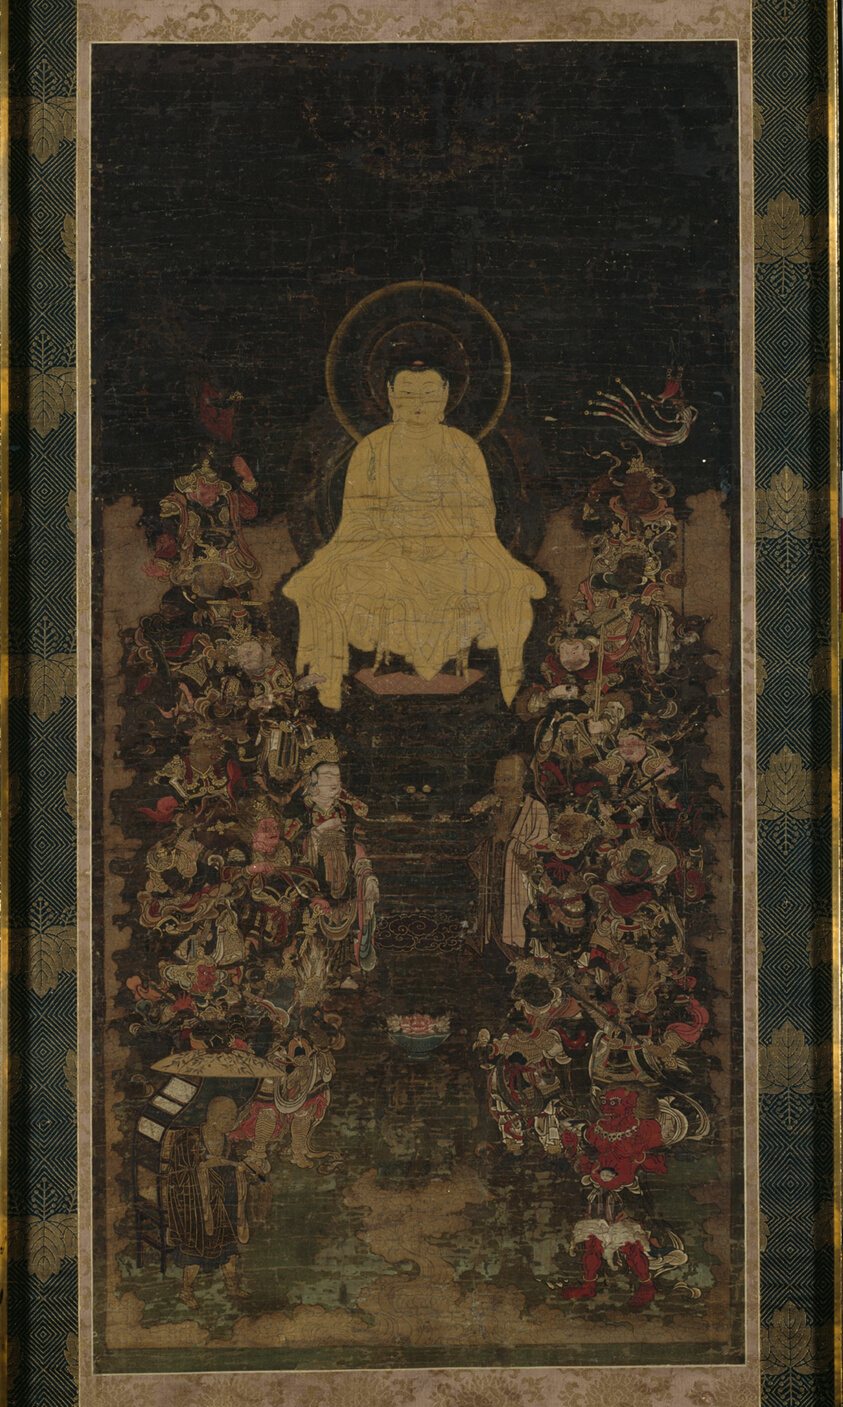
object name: Painting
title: The Buddha Preaching the “Perfection of Wisdom” (Prajnaparamita) Sutra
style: Japanese (culture or style)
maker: Artist Unknown; Japanese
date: 14th century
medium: Hanging scroll; ink, colors, and gold on silk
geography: Japan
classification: hanging scroll; painting; asian art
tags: Buddhism, religion